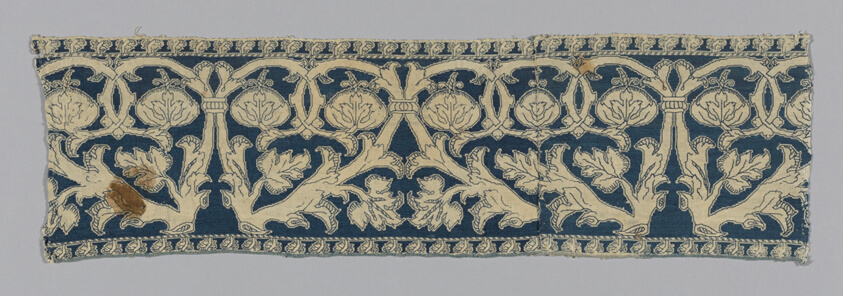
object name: Textile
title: Border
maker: Italy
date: 17th century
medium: Linen, plain weave; embroidered with silk in back and long-armed cross stitches; lower edge finished with silk, twin cord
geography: Italy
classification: textile; needlework (visual works)